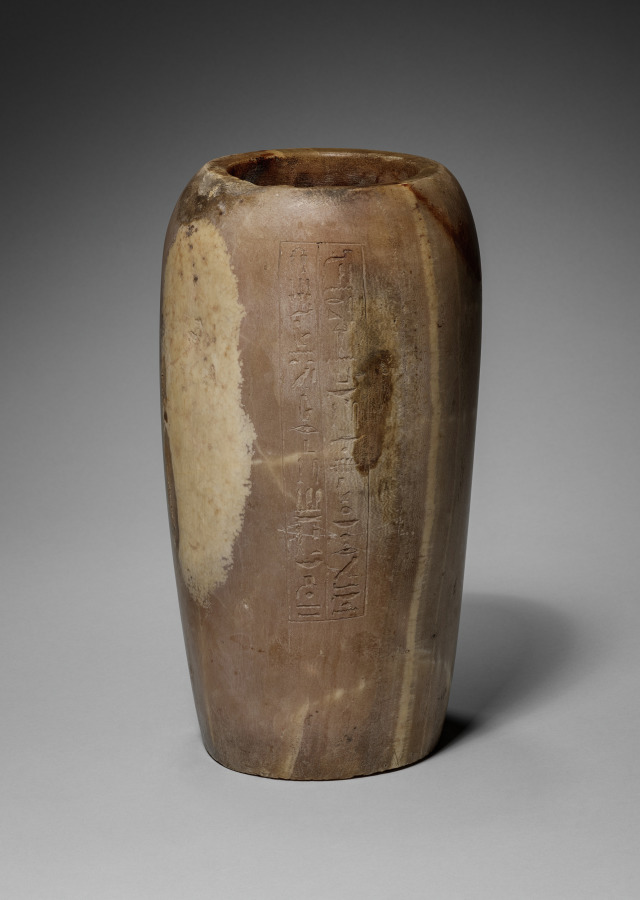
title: Canopic Jar with Falcon's Head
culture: Egypt, Late period (715–332 BCE), Dynasty 26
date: 664–525 BCE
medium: travertine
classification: Funerary Equipment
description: In the process of mummification, the liver, lungs, stomach, and intestines were removed, separately embalmed, and stored in specialized jars known as canopic jars (after a sailor in Greek mythology, who died at the town of Canopus in the Nile Delta and was worshipped there in the form of a human-headed jar). Each organ was identified with one of four funerary deities collectively known as the Sons of Horus: the liver with Imsety (man's head), the lungs with Hapy (baboon's head), the stomach with Duamutef (jackal's head), and the intestines with Qebehsenuef (falcon's head). It was their duty to protect the deceased and restore to him his body parts in the hereafter.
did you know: The falcon-headed deity Qebehsenuef protected the contents of this canopic jar. It contained the remains of the deceased's intestines, which were kept safe for the afterlife.